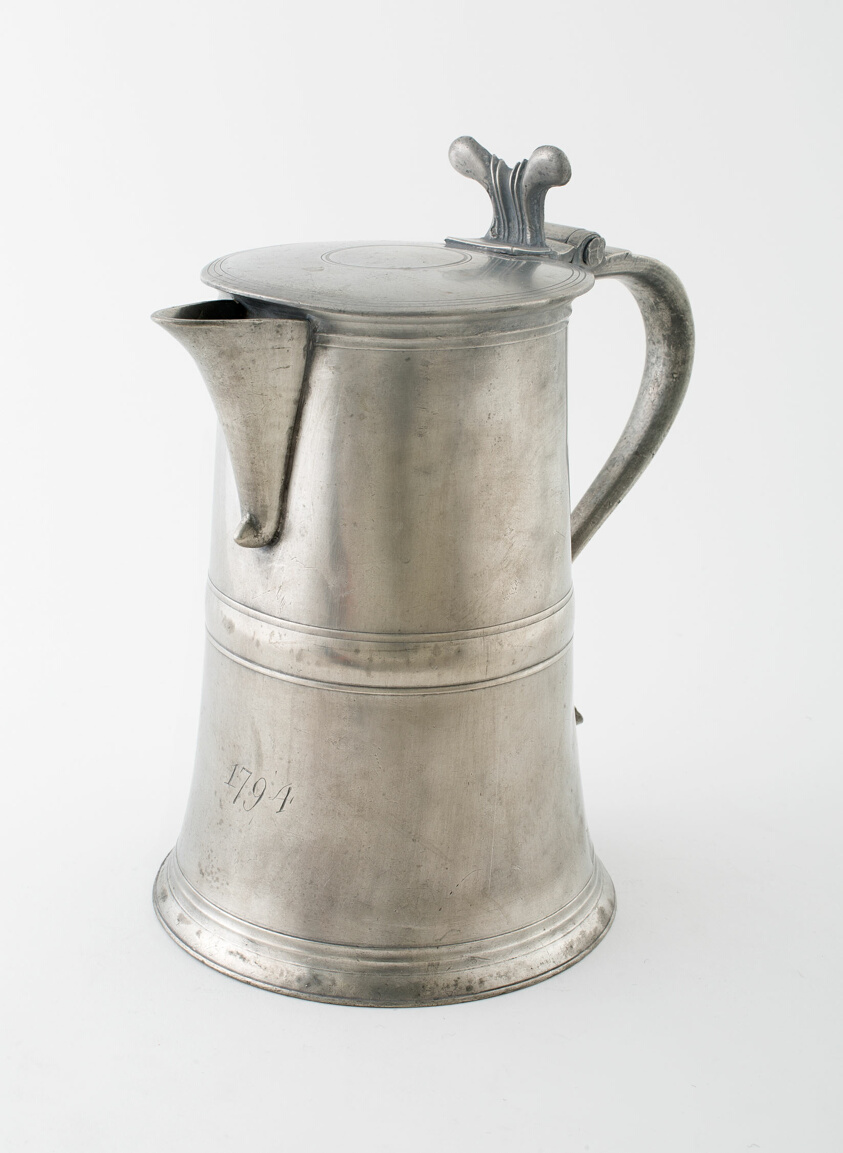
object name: Metalwork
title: Covered Communion Flagon with Spout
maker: Stephen Maxwell; Scottish, active c. 1781-c. 1800; Glasgow, Scotland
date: c. 1787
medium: Pewter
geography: Glasgow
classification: pewter; metalwork; european decorative arts